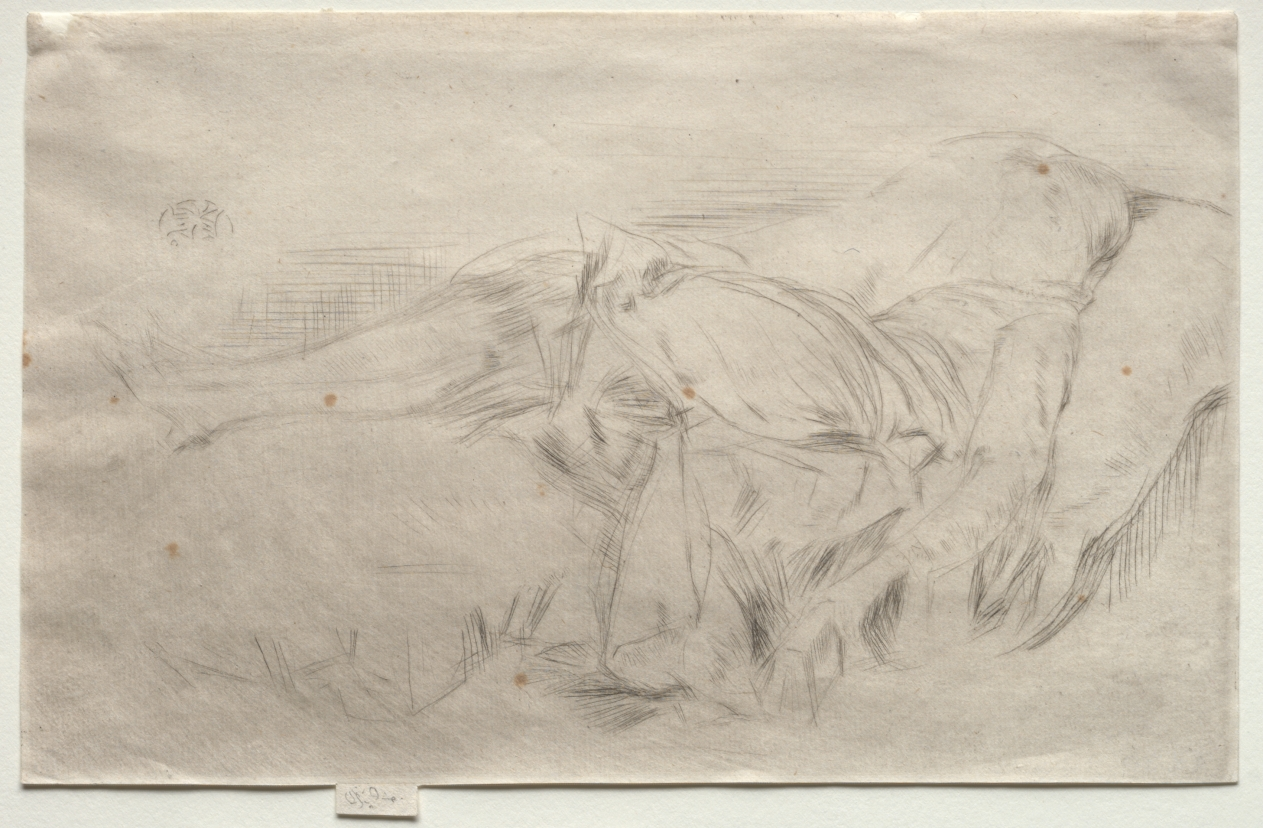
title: A Child on a Couch, No. 2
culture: America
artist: James McNeill Whistler (American, 1834–1903)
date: 1874–75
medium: drypoint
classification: Print